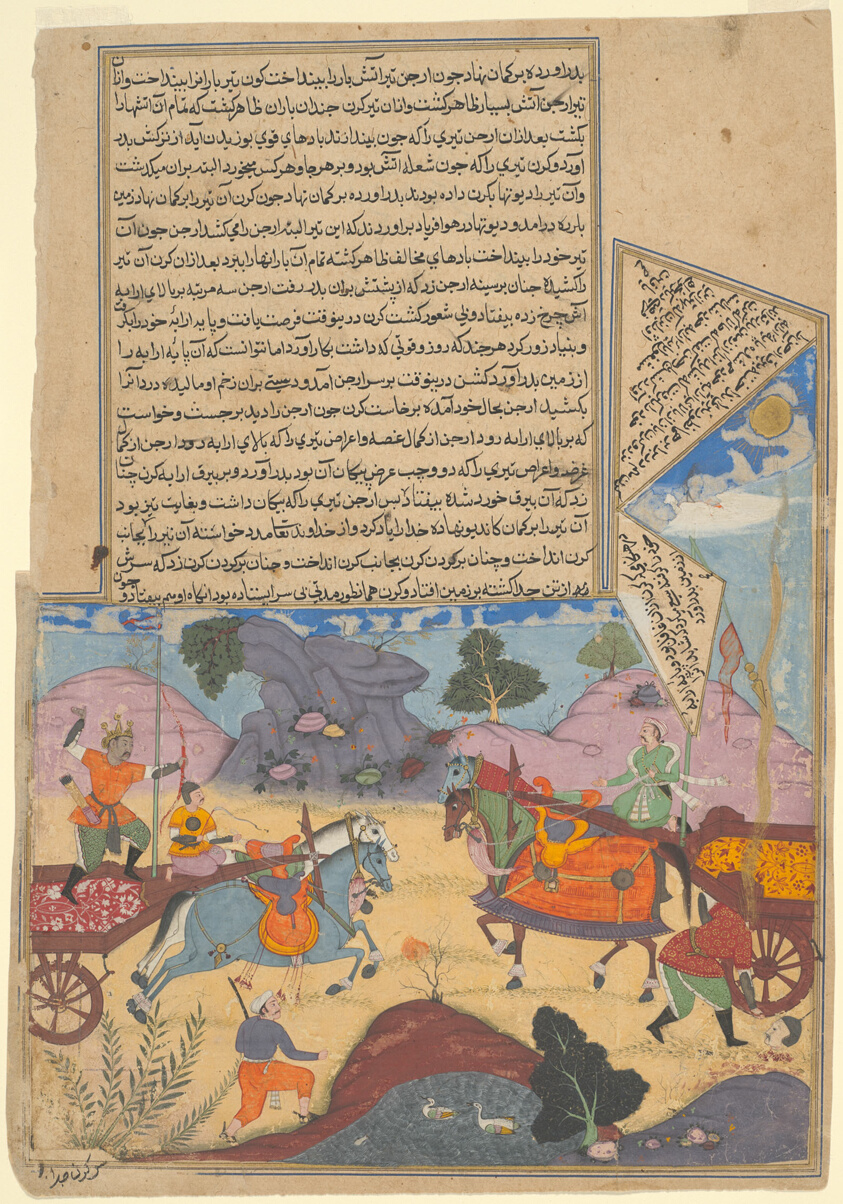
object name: Painting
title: Arjuna Slays Karna, from a copy of the Razmnama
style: Islamic (culture or style), mughal, Indian (South Asian), South Asian, asian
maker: India; Attributed to Fazl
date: Mughal dynasty (1526-1857), c. 1616-1617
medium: Opaque watercolor and gold on paper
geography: India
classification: painting; manuscript; asian art